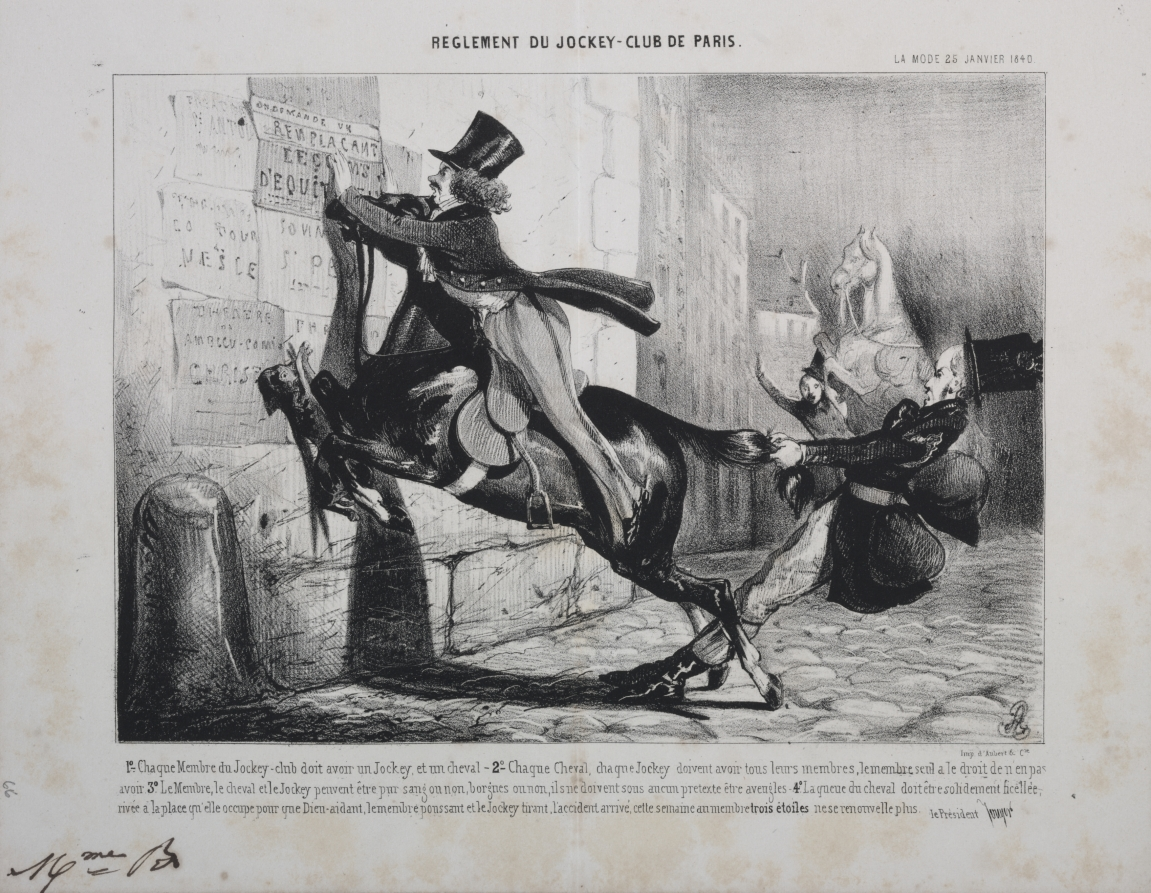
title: Réglement du Jockey Club de Paris: Chaque membre du Jockey Club doit avoir un Jockey, et un cheval...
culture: France, 19th century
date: 1800s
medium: lithograph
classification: Print